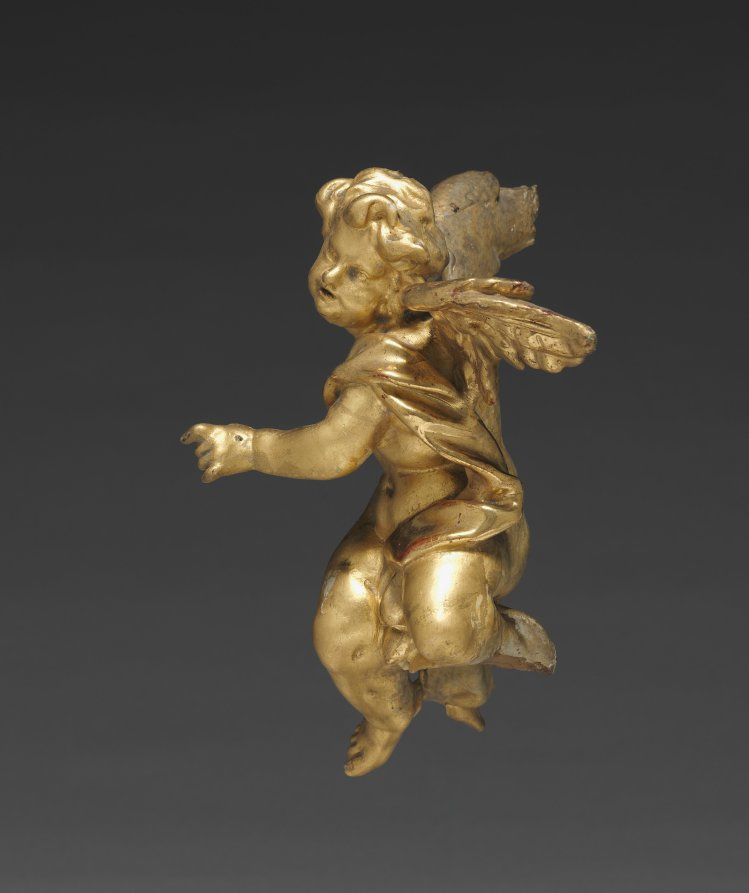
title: Altarpiece with Relics - Putto, middle left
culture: Germany, Bavaria, 18th century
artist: Joseph Matthias Götz (German, 1696–1760)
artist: and Workshop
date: c. 1735–1740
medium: gilded wood, with relics in niches: gilded wood, mother-of-pearl, ebony, red silk, gold wire, seed pearls, rock crystal, pen and ink on paper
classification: Sculpture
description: Götz covers every surface in gold leaf, giving each part of the object equal importance, rather than simply framing a central picture. In this distinctively Central European approach, figural narrative is subordinate to the overall ensemble. Götz designed this object to rest on top of an altar, probably in front of a larger painted or sculpted decorative scheme. The work contains relics seen through the small windows on the perimeter. These small remains of holy figures demonstrate the persistence of a medieval Catholic tradition well into the 1700s.